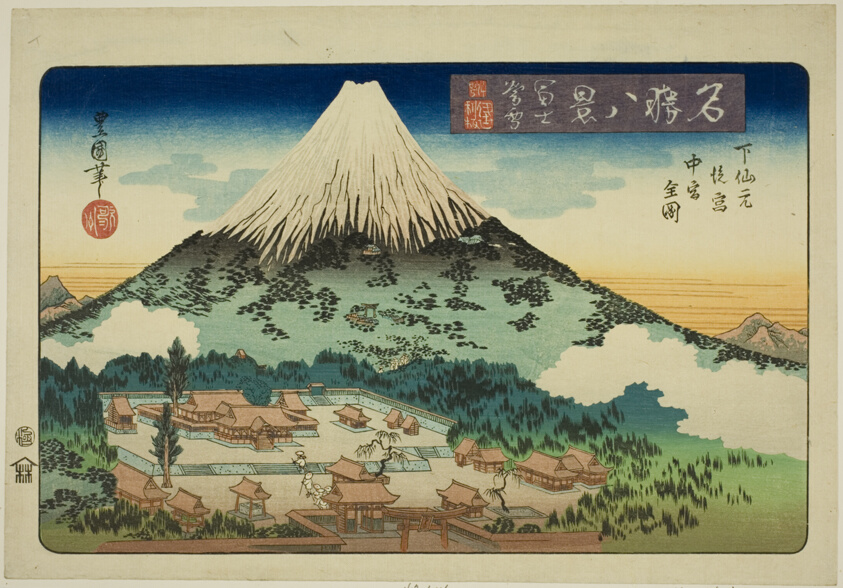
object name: Print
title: Evening Snow on Mount Fuji, Complete View of the Inner and Middle Shrines at Shimo Sengen (Fuji bosetsu, Shimo Sengen atomiya nakamiya zenzu), from the series "Eight VIews of Famous Places (Meisho hakkei)"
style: Japanese (culture or style)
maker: Utagawa Toyoshige (Toyokuni II) (Japanese, 1777-1835)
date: c. 1833/34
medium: Color woodblock print; oban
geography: Japan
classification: woodblock print; print; asian art